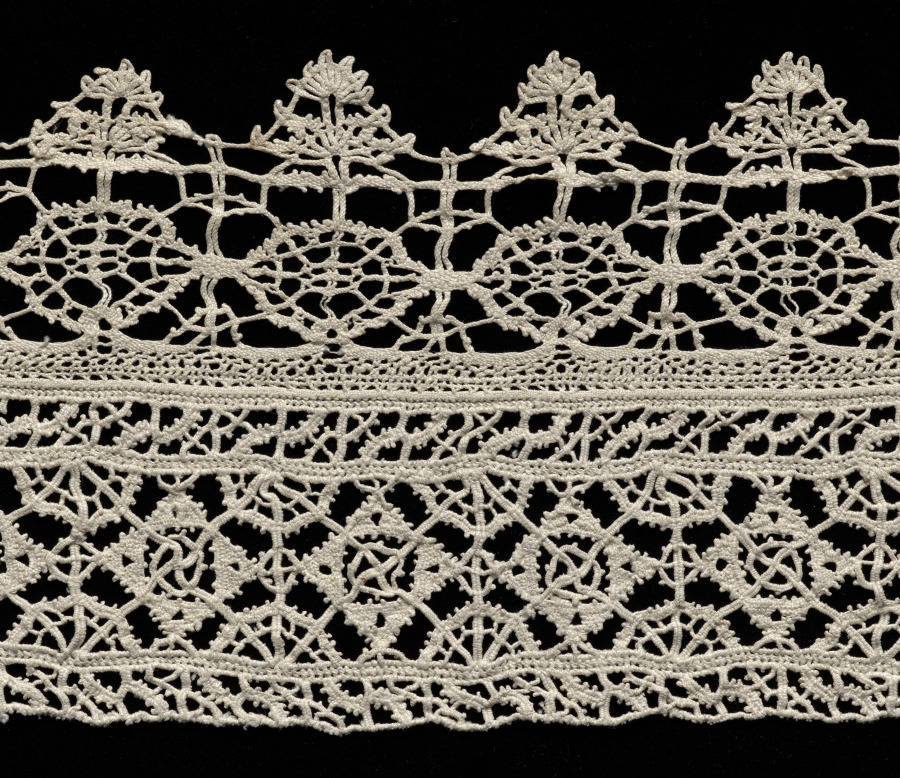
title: Lace Band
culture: Italy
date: 1500s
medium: Linen: needle lace (reticella) and bobbin lace edging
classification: Lace